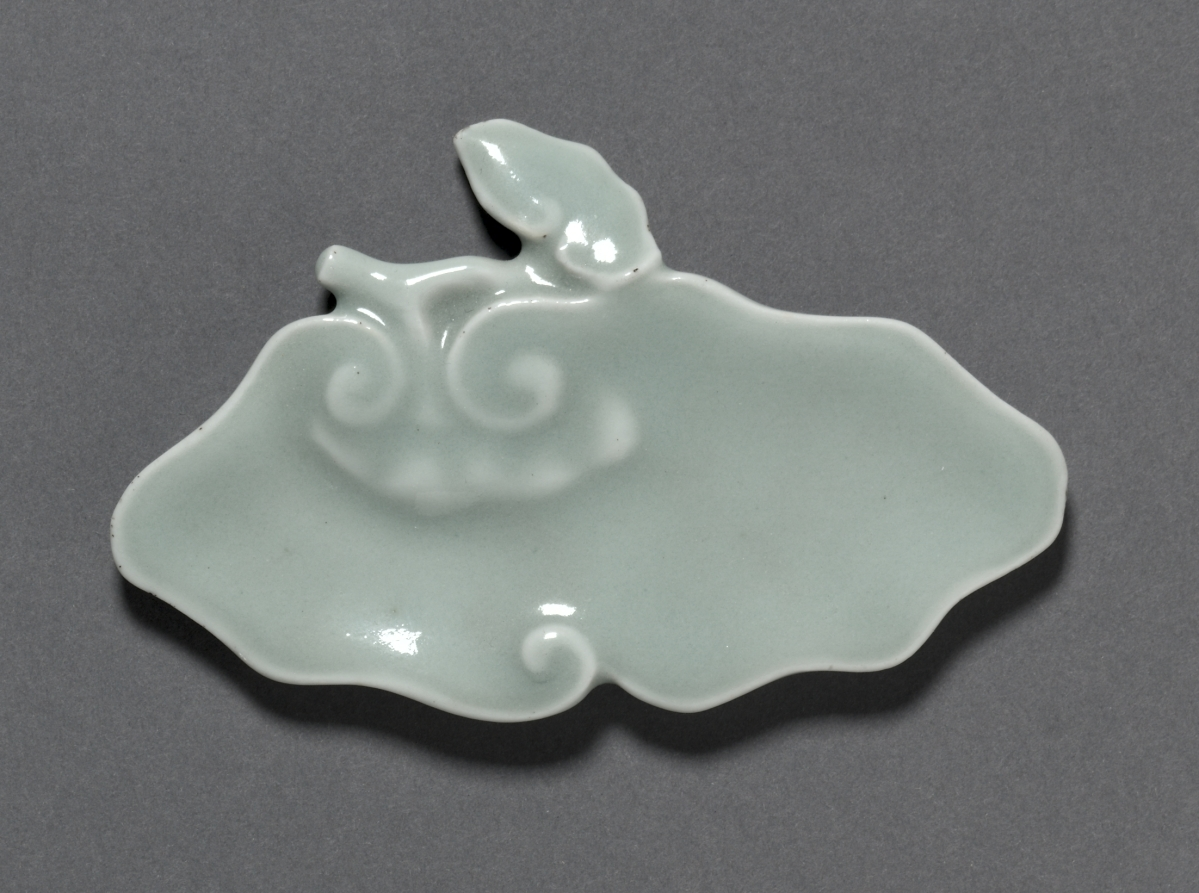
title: Brushwasher in Form of Lingzhi Fungus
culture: China, Jiangxi province, Jingdezhen kilns, Qing dynasty (1644-1911), Qianlong mark and reign (1736-95)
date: 1736–95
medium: porcelain with celadon glaze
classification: Ceramic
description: In China, access to political power was granted to those who passed the civil service examinations, a system that offered official service only at a high level of education. Chinese literati-officials, whose daily routine involved administrative work in an office, enjoyed precious objects on their writing desks that offered distraction and demonstrated good taste. By the Ming (1368–1644) and Qing (1644–1911) dynasties, these utensils of the literati studio became also collectibles and were treasured as artworks. Desk objects included paper weights, seals and seal paste boxes, brush rests like this porcelain one, wrist rests, brush holders, water droppers, ink cakes, miniature mountains, and albums, all ranging in material from jade, gilt bronze, lacquer, and wood to porcelain.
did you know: Lingzhi is a woody mushroom often used in traditional Chinese medicine and associated with immortality.